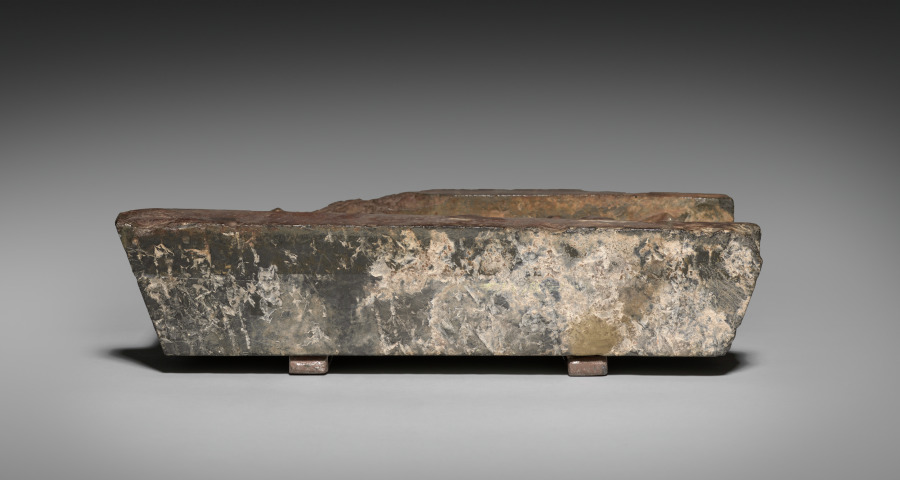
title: Monster Caryatid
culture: China, possibly from Xiangtangshan, Northern Qi dynasty (550–577)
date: late 500s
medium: Limestone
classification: Sculpture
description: This squatting monster with claws on its knees, braces its shoulders against an overhanging molding. The half-human, half-animal creature was likely part of a Buddhist cave-temple complex at Xiangtangshan, in Hebei Province, northwest China. Found in the lower registers of stone monuments of either architectural structures or statues of Buddhist deities, such monsters had a supportive function. Their scary appearance was believed to keep evil spirits away from the sacred sites.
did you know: The complex of Buddhist cave temples at Xiangtangshan, “Mountain of Echoing Halls,” is a central achievement of the Northern Qi period.